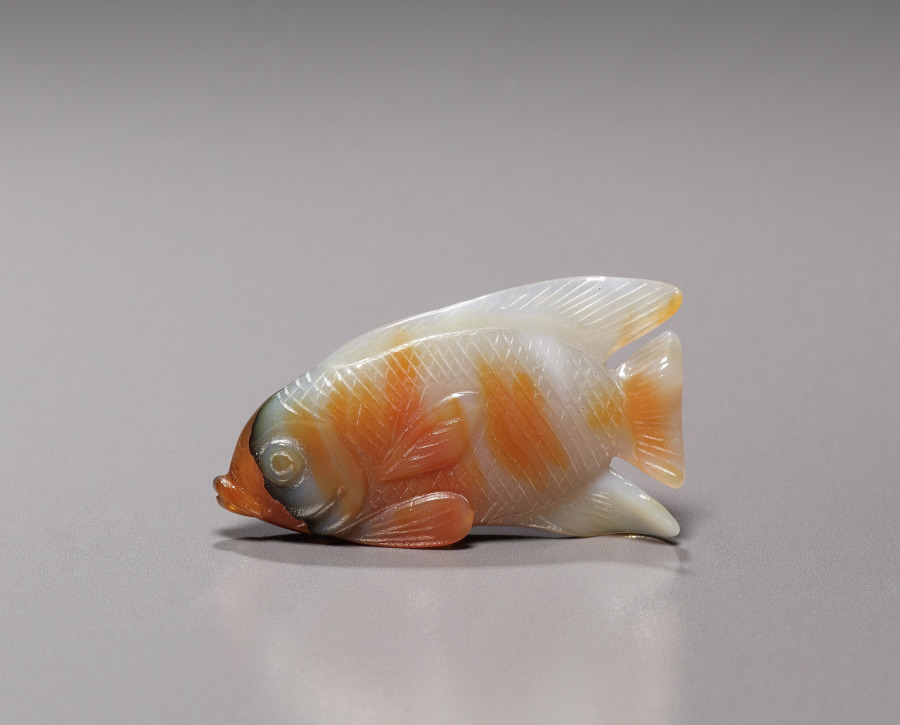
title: Fish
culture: Russia, St. Petersburg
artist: House of Fabergé (Russian, 1842–1918)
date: c. 1890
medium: agate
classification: Miscellaneous